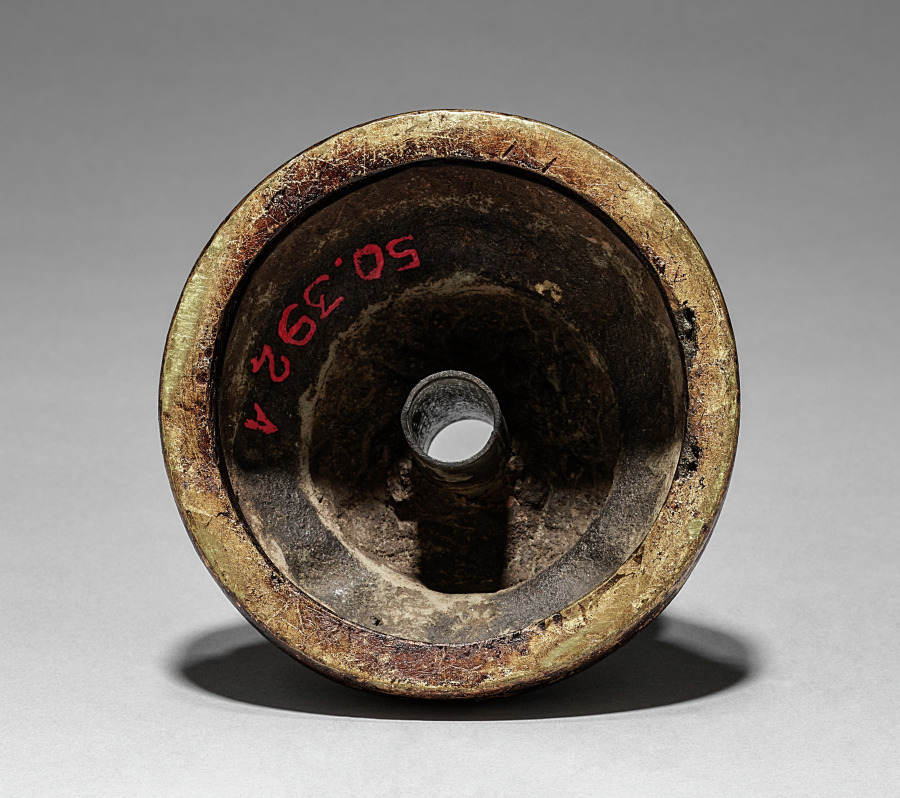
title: Kannon (base)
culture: Japan, Asuka period (538–710)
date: mid-600s to early 700s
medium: gilt bronze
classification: Sculpture